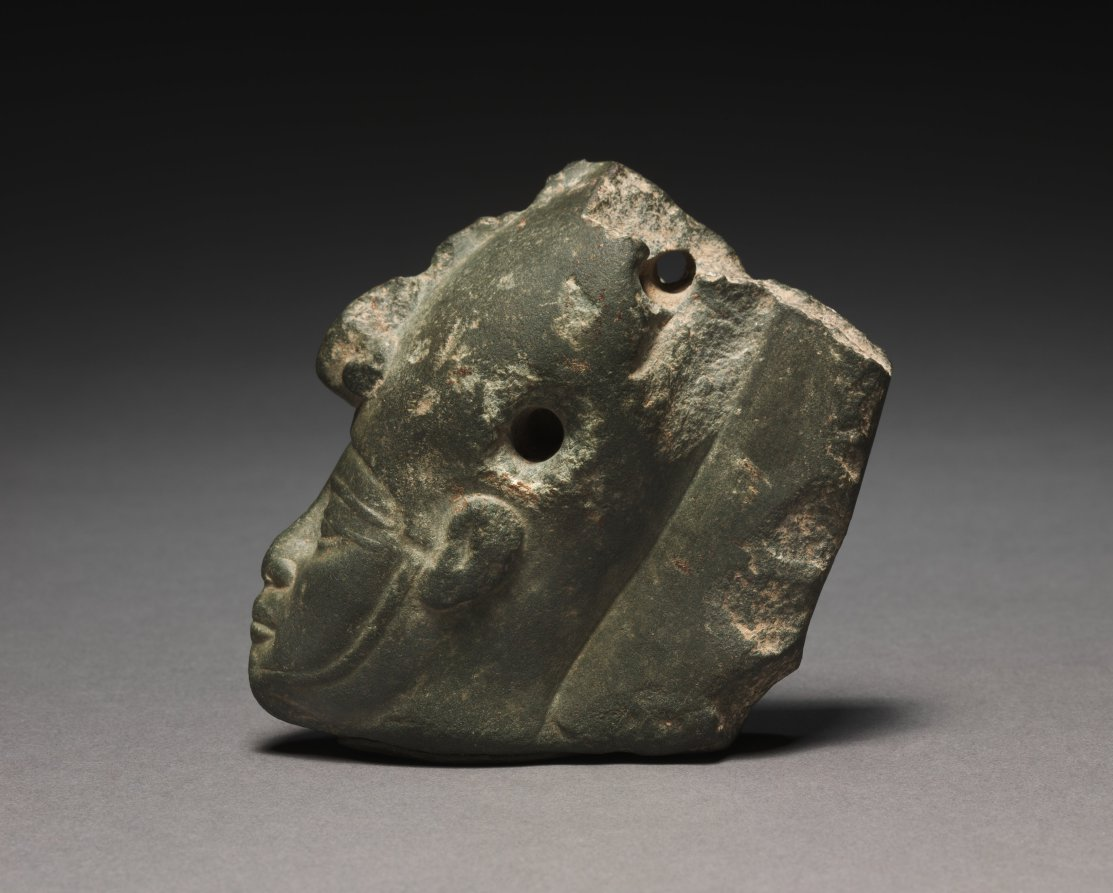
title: Head of a King or Osiris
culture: Egypt, Modern forgery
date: 1900–1915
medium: graywacke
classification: Sculpture